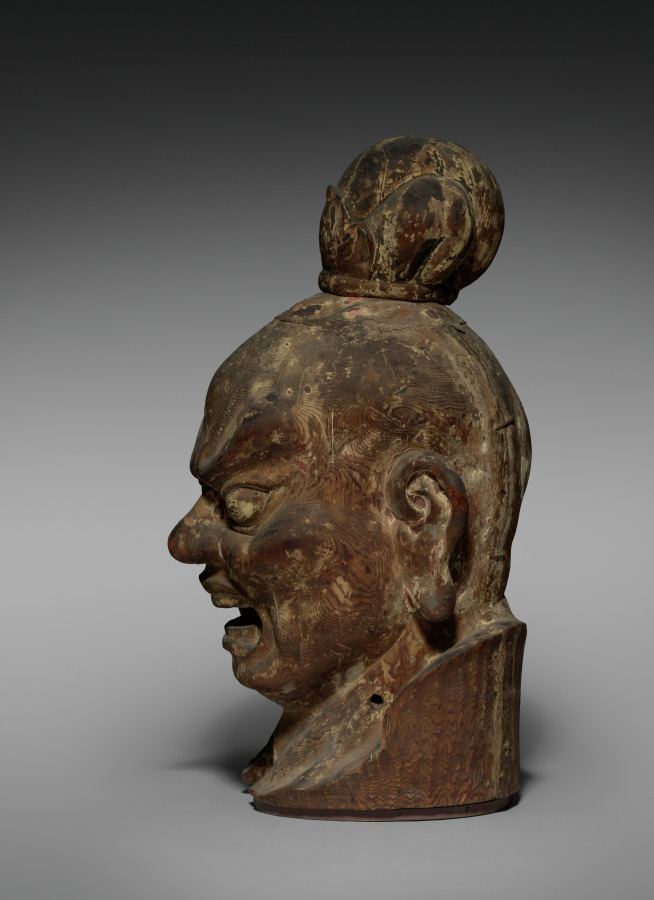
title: Head of Ni-o with Open Mouth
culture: Japan, Kamakura period (1185–1333)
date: 1200s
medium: wood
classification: Sculpture